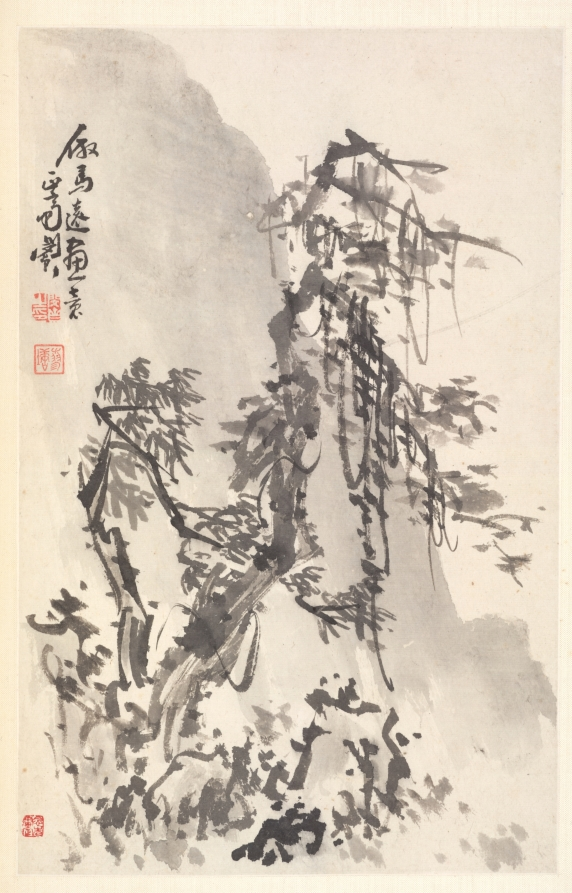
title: Landscape in the Manner of Ma Yuan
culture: China, Qing dynasty (1644-1911)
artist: Min Zhen (Chinese, 1730–after 1788)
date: 1788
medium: album leaf, ink on paper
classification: Painting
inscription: Inscription by Min Chen on the last leaf: I have a habit of collecting strange rocks. My friend Tai-li shan-jen* treasures my paintings as much as I treasure strange rocks. Once we agreed to exchange what we love with each other. However, my busy activities have kept me from carrying this out. This summer I realized that this strange rock has been sitting in my studio for five years, so I painted this to fulfill my old promise. As a record, I chose the grotesque cliff in the last scene of this twelve-leaf album. Cheng-chai, Min Chen inscribed this on the sixth day of the sixth month [July 9] of the wu-shen year [1788]. * Tai-li shan-jen is Wang Li [tzu: Li-fu] tr. Hou-mei Ishida Six seals appearing on the leaves: Min Chen, Cheng-chai, Ching-ch'iao, Chen, Liao-t'ang, Min Chen chih-yin.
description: Min Zhen, who was orphaned at age 12 and developed an eccentric personality, was trained by Tang Yin (1682–1756), a writer, playwright, and superintendent of the imperial porcelain workshops in Jingdezhen. The connection to him may have enabled Min to stay in Beijing for a decade from around 1773. It is not clear whether he ever resided in Yangzhou, but his style is in many instances reminiscent of that of Yangzhou artist Huang Shen. This album demonstrates Min’s versatility and mature style in the last years of his life.